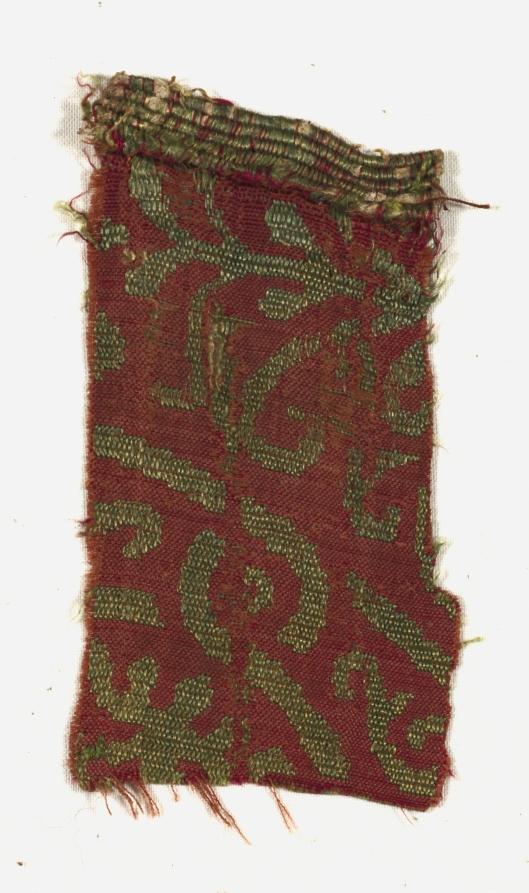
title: Silk Fragment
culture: Spain, Islamic period or Mudejar, 13th century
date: 13th century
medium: lampas weave, brocaded; silk and gold thread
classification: Textile